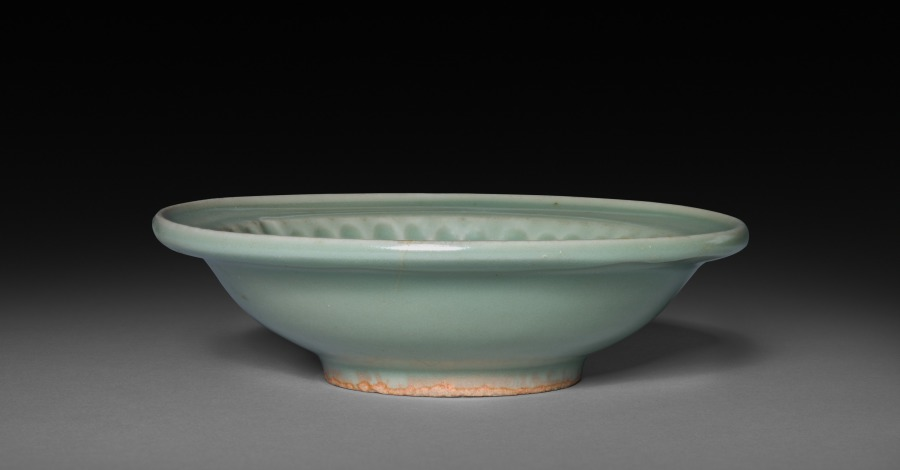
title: Plate: Longquan Ware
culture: China, Southern Song Dynasty (1127-1279) - Yuan Dynasty (1271-1368)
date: 1200s-1300s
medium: glazed porcelain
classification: Ceramic